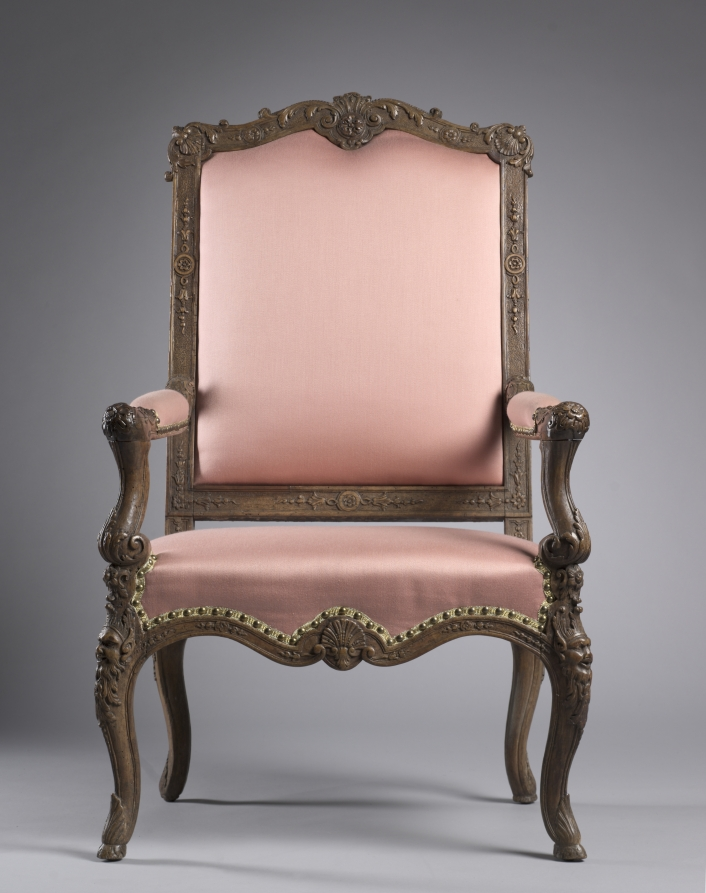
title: Armchair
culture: France, 18th century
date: c. 1715–1723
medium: oak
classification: Furniture and woodwork